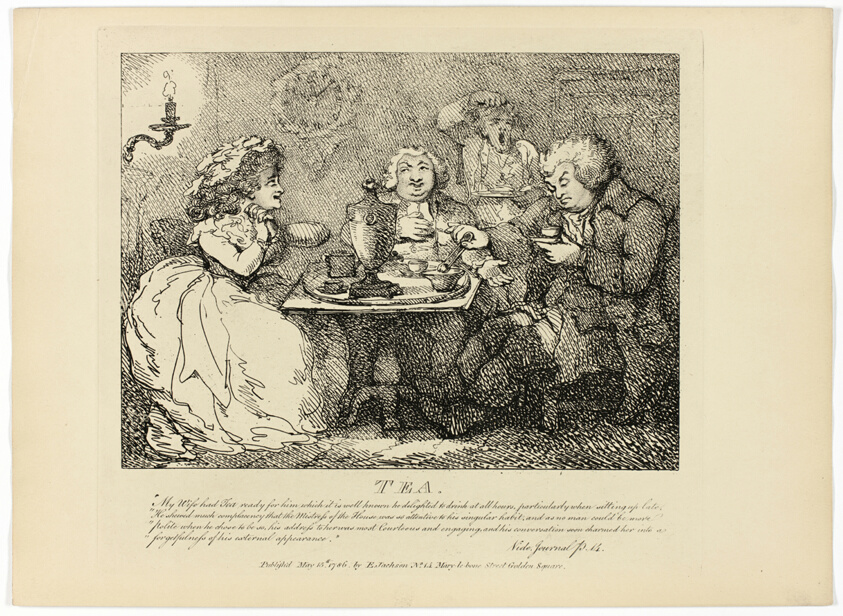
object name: Print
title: Tea, from Boswell's Tour of the Hebrides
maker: Thomas Rowlandson (English, 1756-1827)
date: 1786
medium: Etching on paper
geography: England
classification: etching; print; prints and drawing